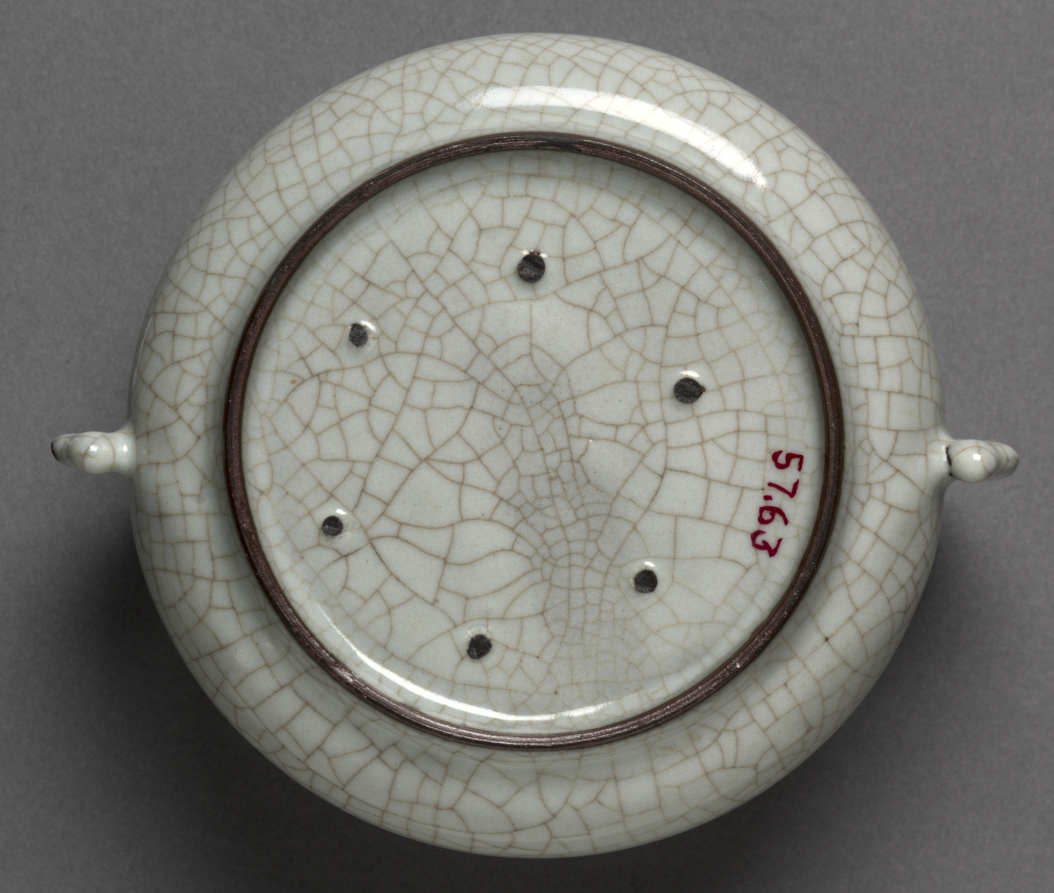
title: Incense Burner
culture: China, Zhejiang province, Hangzhou, Southern Song dynasty (1127-1279)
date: 1200s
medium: porcelaneous stoneware, Guan ware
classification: Ceramic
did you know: There are six spur marks on the incense burner's glazed base.